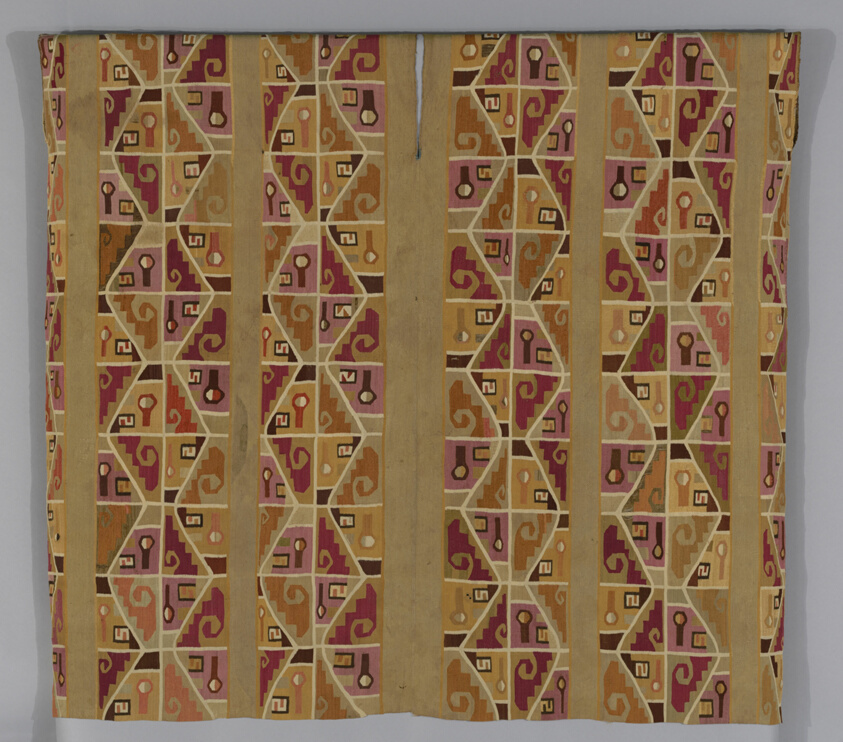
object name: Costume and Accessories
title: Tunic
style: huari, early intermediate period, Pre-Columbian, americas, peruvian, andes, andean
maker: Wari (Probably central or south coast, Peru)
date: 600-800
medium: Cotton and wool (camelid), single interlocking tapestry weave; neck and armholes finished with wool (camelid) in overcast stitches; seams joined with wool (camelid) in darning stitches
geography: Peru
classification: textile; weaving; costume; costume - weaving; tunic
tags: abstract figures, patterns, geometric, spiral, zigzags, hats, faces